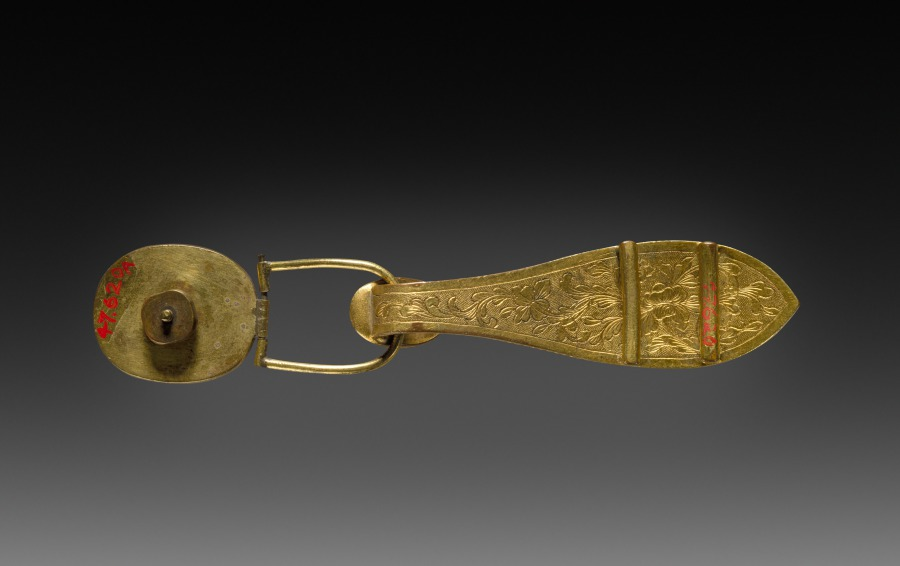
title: Buckle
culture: China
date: 1900s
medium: gilt brass, engraved and set with jade and quartz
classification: Jewelry